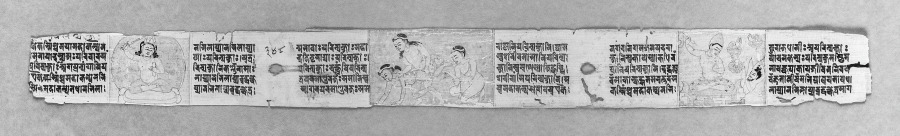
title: Bodhisattva Samantabhadra purifies the path to enlightenment, with Manjushri, folio 348 (verso) from a Gandavyuha-sutra (Scripture of the Supreme Array)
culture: Nepal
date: 1000–1100s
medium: gum tempera and ink on palm leaf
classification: Painting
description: The painting in the center shows a righteous bodhisattva tossing aside a blue-skinned heretic, while an impious blue-clad monk sits behind them, the next to be overpowered by the righteous one. In the painting on the left, the Bodhisattva of Wisdom, Manjushri, brandishes his sword, and at the far right, a Buddhist priest (Vajracharya) sets fire to a Hindu sage in a rocky landscape.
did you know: Blue-clad monks were said to visit prostitutes, drink liquor, and practice extreme tantric rituals.